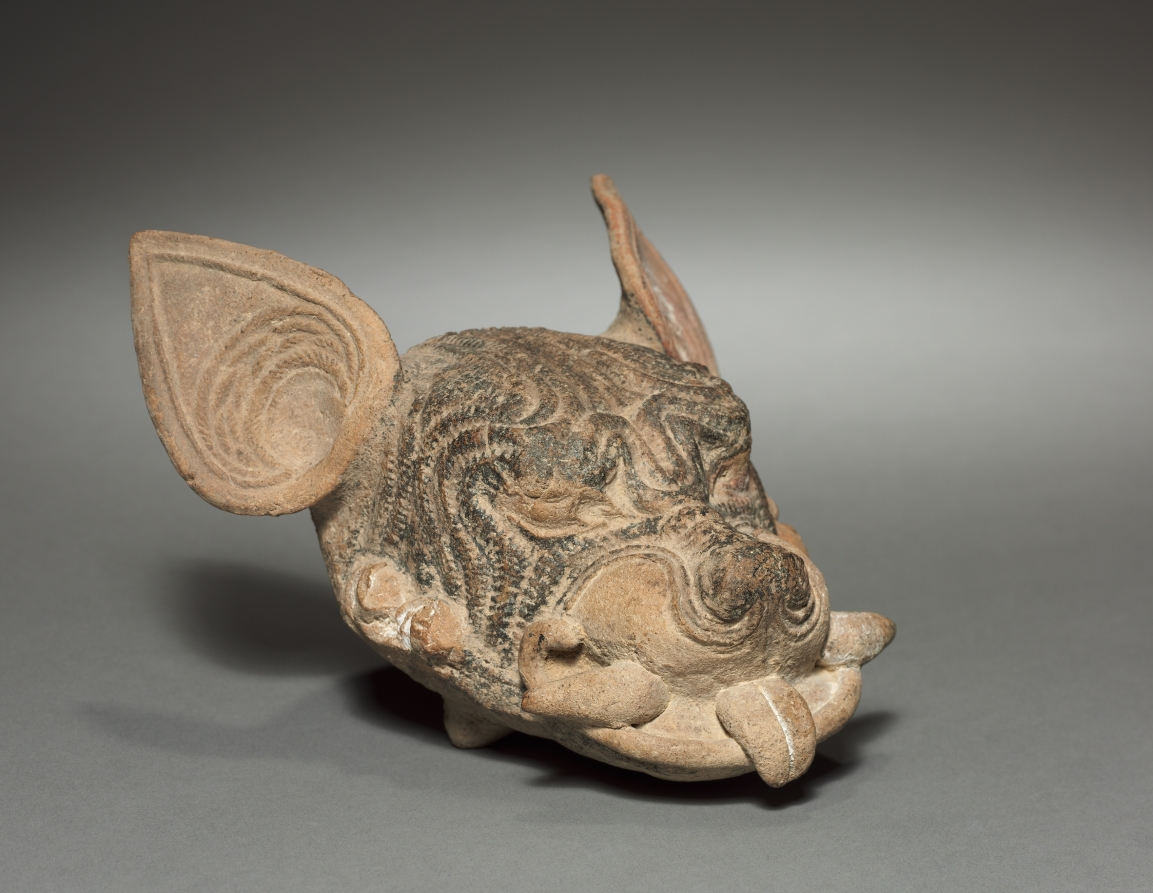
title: Dog Head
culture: Mexico, Gulf Coast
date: 500–1000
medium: earthenware, asphalt and resin paint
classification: Sculpture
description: This dog's snarl and protruding fangs lend him a sinister expression. Although pierced for suspension, the head seems too large and fragile to have been a pendant. Press-molds, used to create the dog's face and ears, were commonly used in the Gulf Coast region, where asphalt occurs naturally and was applied to pottery as a paint after firing.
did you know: This ceramic was analyzed using thermoluminescence dating; it was fired between 900 and 1,500 years ago.